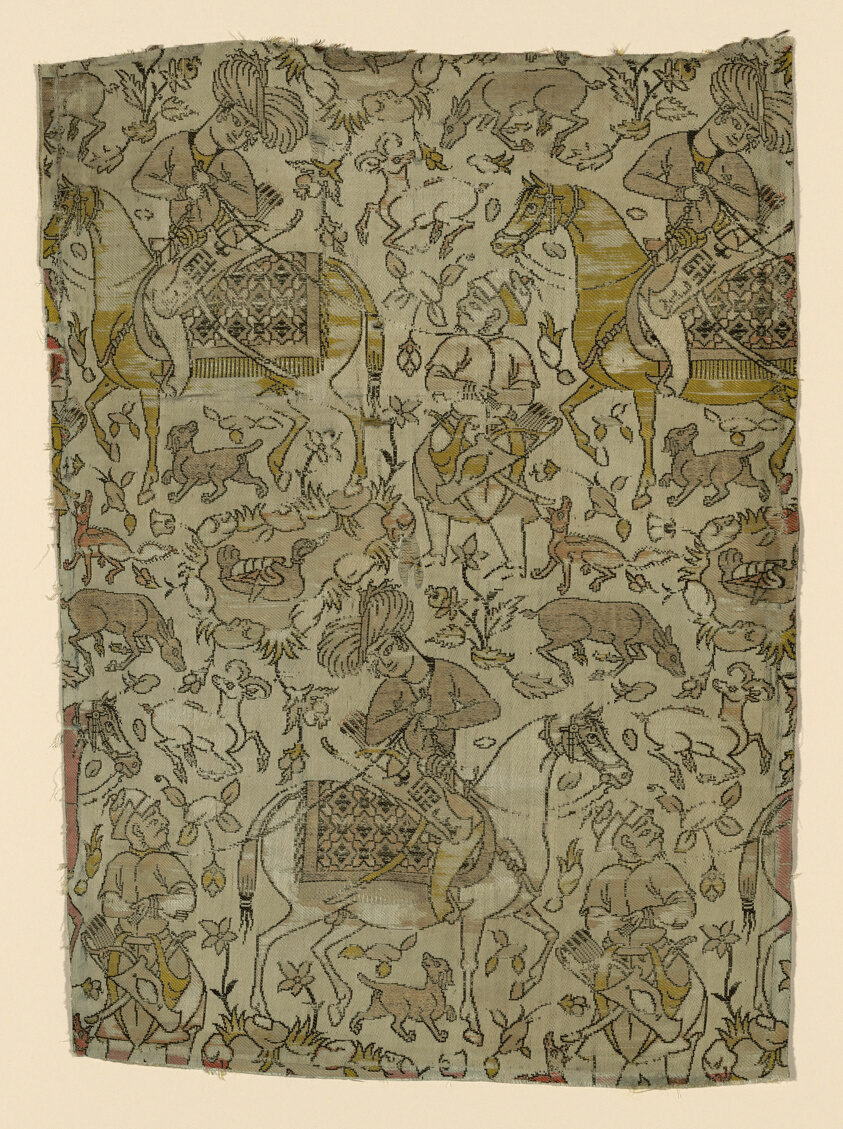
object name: Textile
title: Fragment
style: safavid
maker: Iran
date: first half of the 17th century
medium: Silk, gilt-metal-strip-wrapped silk; satin weave foundation with a supplementary twill weave and brocading wefts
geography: Iran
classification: textile; weaving